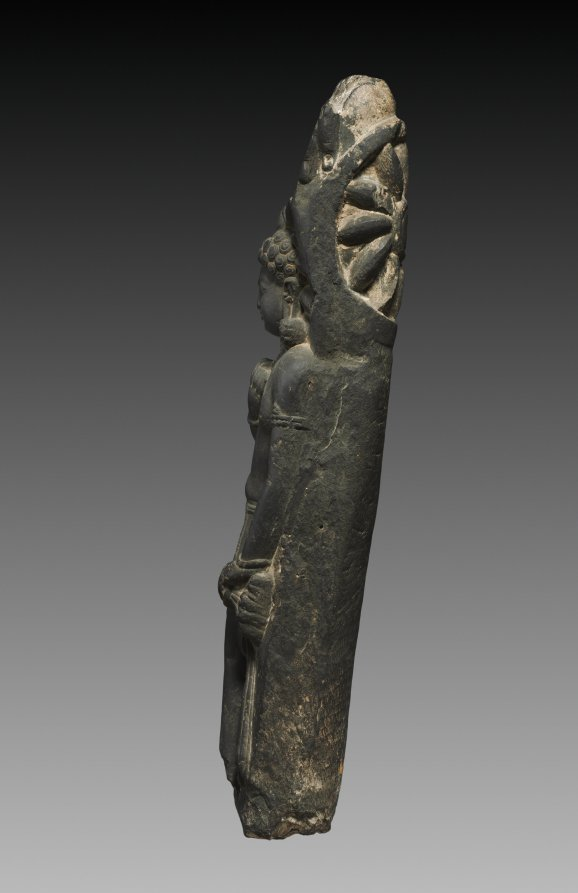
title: Personification of the Discus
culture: Northeastern India, Bihar, Aphsad, early Pala period, 7th Century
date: 670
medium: chlorite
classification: Sculpture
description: Vishnu's main weapon is the discus, or chakra in Sanskrit. Vishnu's chakra is a wheel that is a metaphor for true knowledge, which he uses in mythic battles to slice demons who stand for ignorance and self-centered arrogance. Iconic images of Vishnu show him as four-armed, with a discus in one hand; sometimes the discus is personified. This personification, with the chakra behind his head, has broken away from the main image of Vishnu. Stylistically this sculpture retains memories of the Gupta styles, with the lush ringlets of hair curling from a central part, the relatively simple adornments, and the soft contours of the body. The exaggerated facial expression and figural proportions indicate a transition to a later period.